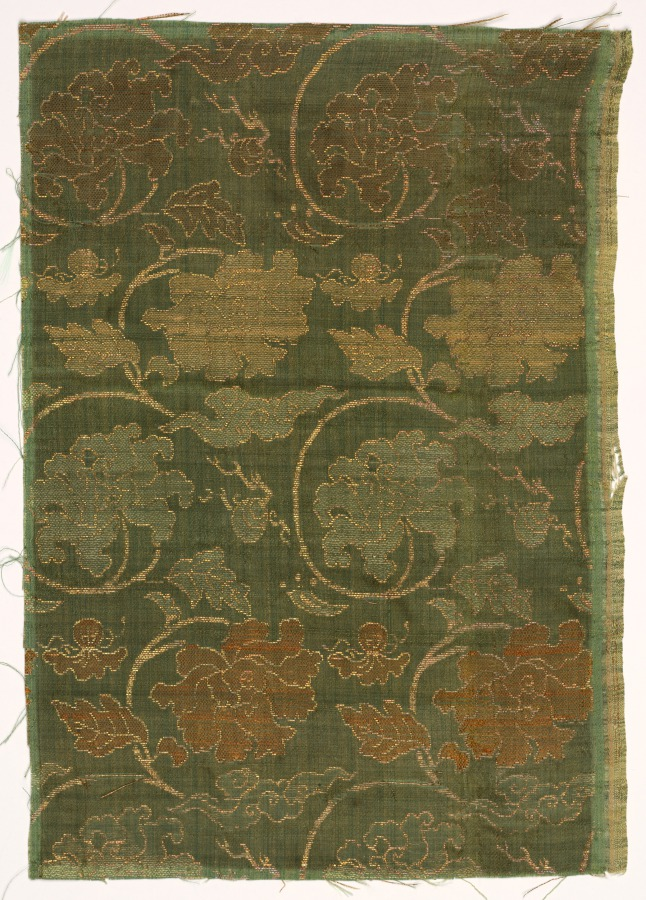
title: Fragment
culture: China ?, 19th century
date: 1800s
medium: silk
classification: Textile